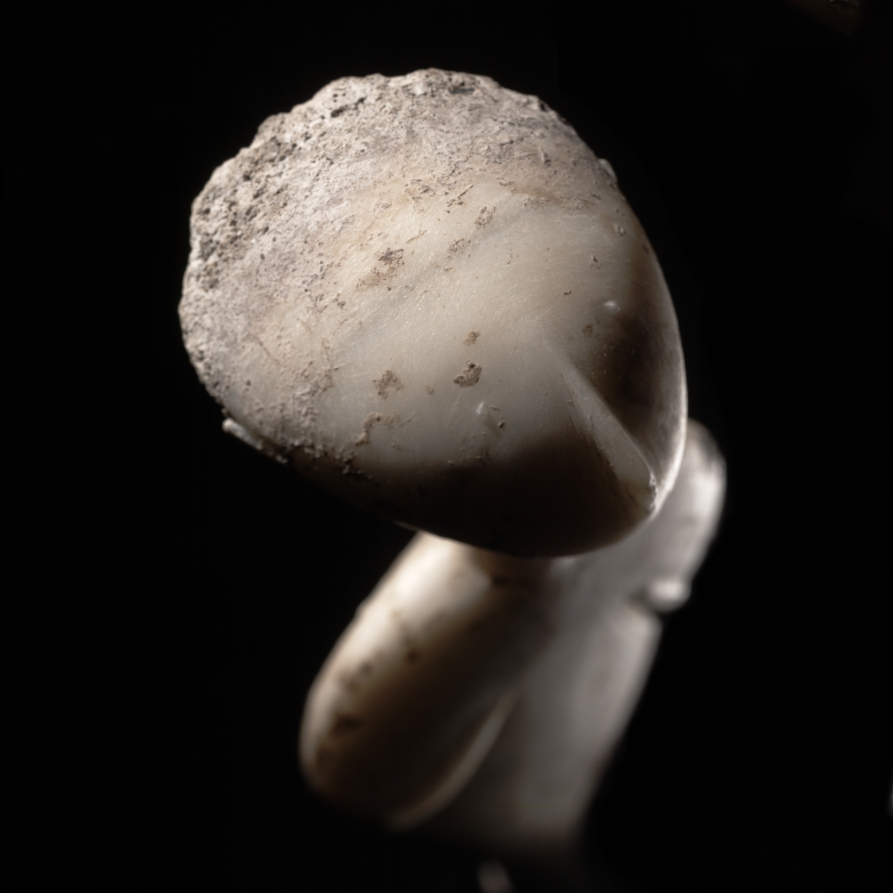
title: Statuette of a Woman: "The Stargazer"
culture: Western Anatolia, early Bronze Age (c. 3300–1200 BCE)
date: c. 3000 BCE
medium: marble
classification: Sculpture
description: "The Stargazer" moniker was given to this diminutive marble sculpture because its upturned head looks toward the heavens. Details carved into the stone are visible while painted features have been lost to time. We do not know how this object was used, but its enigmatic nature invites speculation.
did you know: We can identify this mysterious figure as female by the inscribed pubic triangle below her waist.